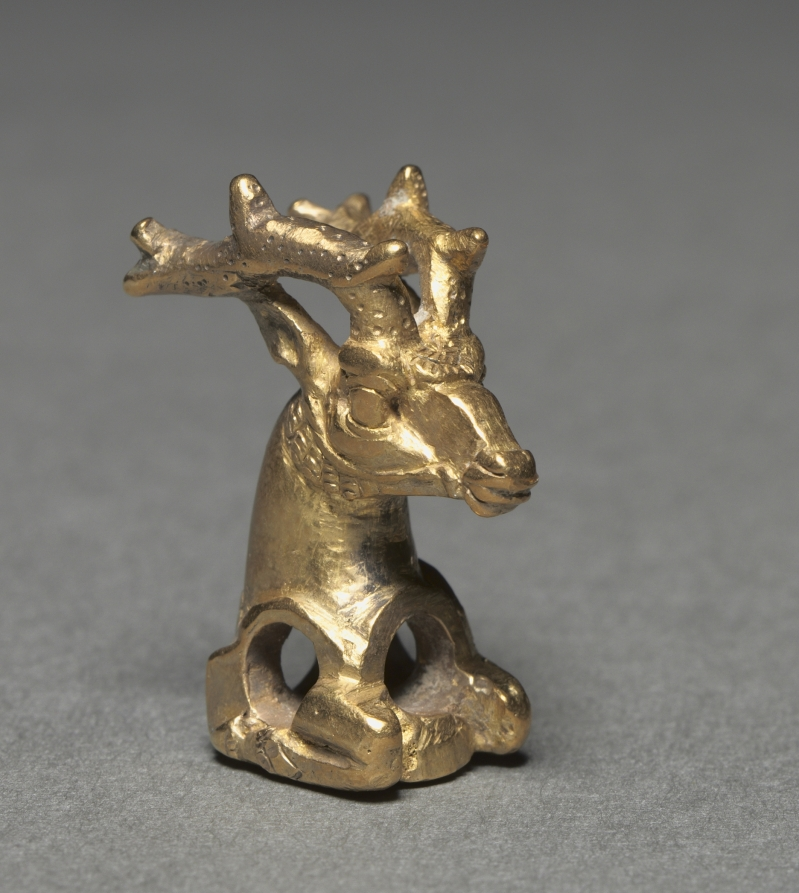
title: Stag Bridle Ornament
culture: Iran or Afghanistan, Sarmatian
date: 400–300 BCE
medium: gold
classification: Metalwork